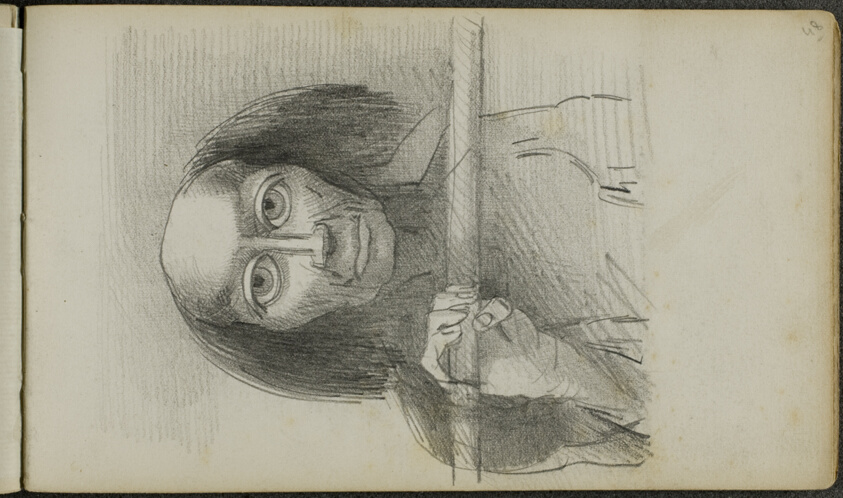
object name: Book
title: Sketchbook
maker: Odilon Redon (French, 1840-1916)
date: c. 1879–85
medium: 55-page sketch book of drawings in pencil on cream wove (with a few buff and blue) paper, with (simulated) laid paper interleaves, bound in black cardboard with black fabric taping on spine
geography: France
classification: sketchbook; graphite; prints and drawing; book; paper